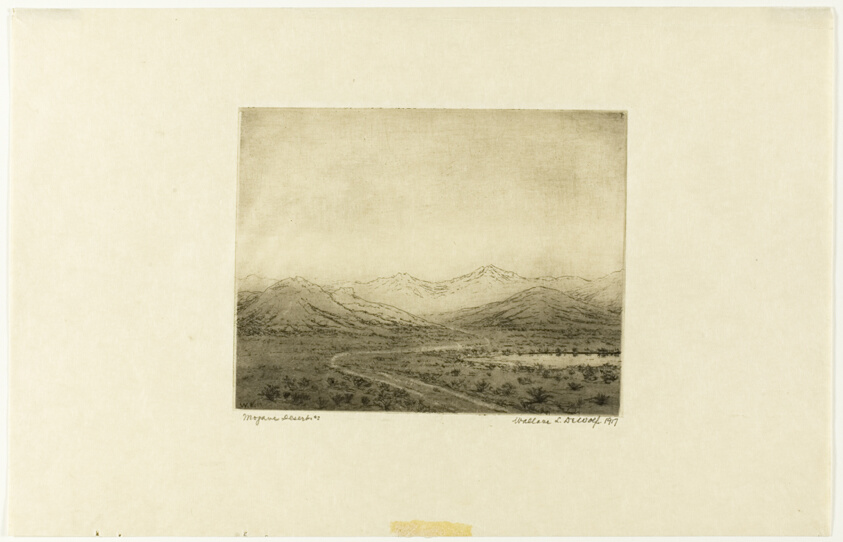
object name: Print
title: Mojave Desert, No. 2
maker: Wallace L. DeWolf (American, 1854-1930)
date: 1917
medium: Etching on cream wove paper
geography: United States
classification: etching; print; prints and drawing